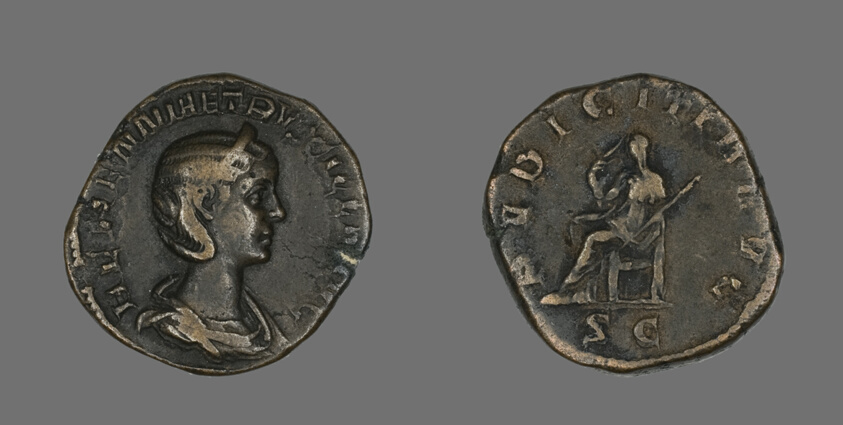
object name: Coin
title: Sestertius (Coin) Portraying Empress Herennia Etruscilla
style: imperial (roman), ancient, roman (ancient, style or period)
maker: Roman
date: 249-251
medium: Bronze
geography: Roman Empire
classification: coin; struck; ancient art